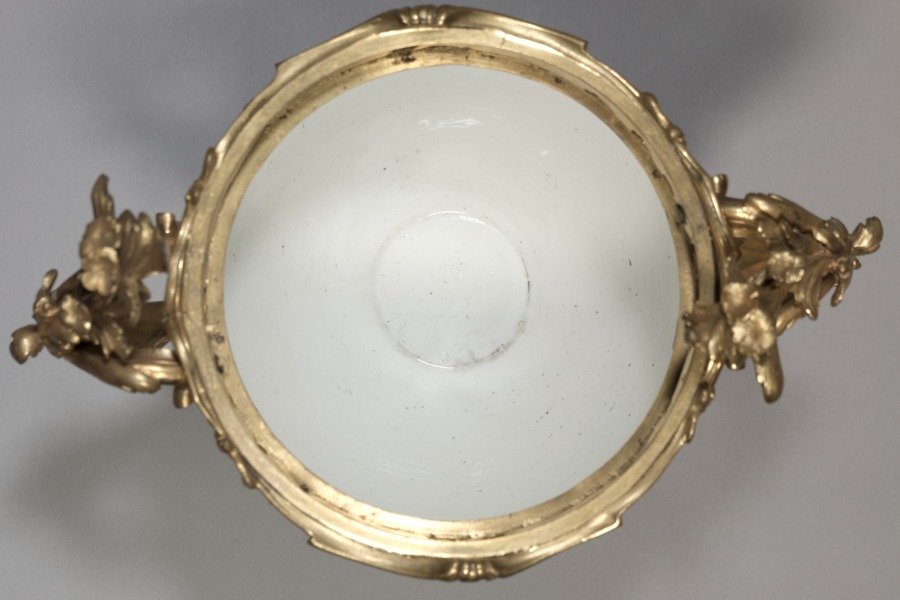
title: Vase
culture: Germany, 18th century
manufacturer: Meissen Porcelain Factory (German, est. c. 1710)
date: 1749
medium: porcelain mounted in gilt bronze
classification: Ceramic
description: One of these vases is dated 1749. They were perhaps part of a set of four covered vases that we know from documents were acquired by Mme. de Pompadour, mistress of Louis XV in 1752.